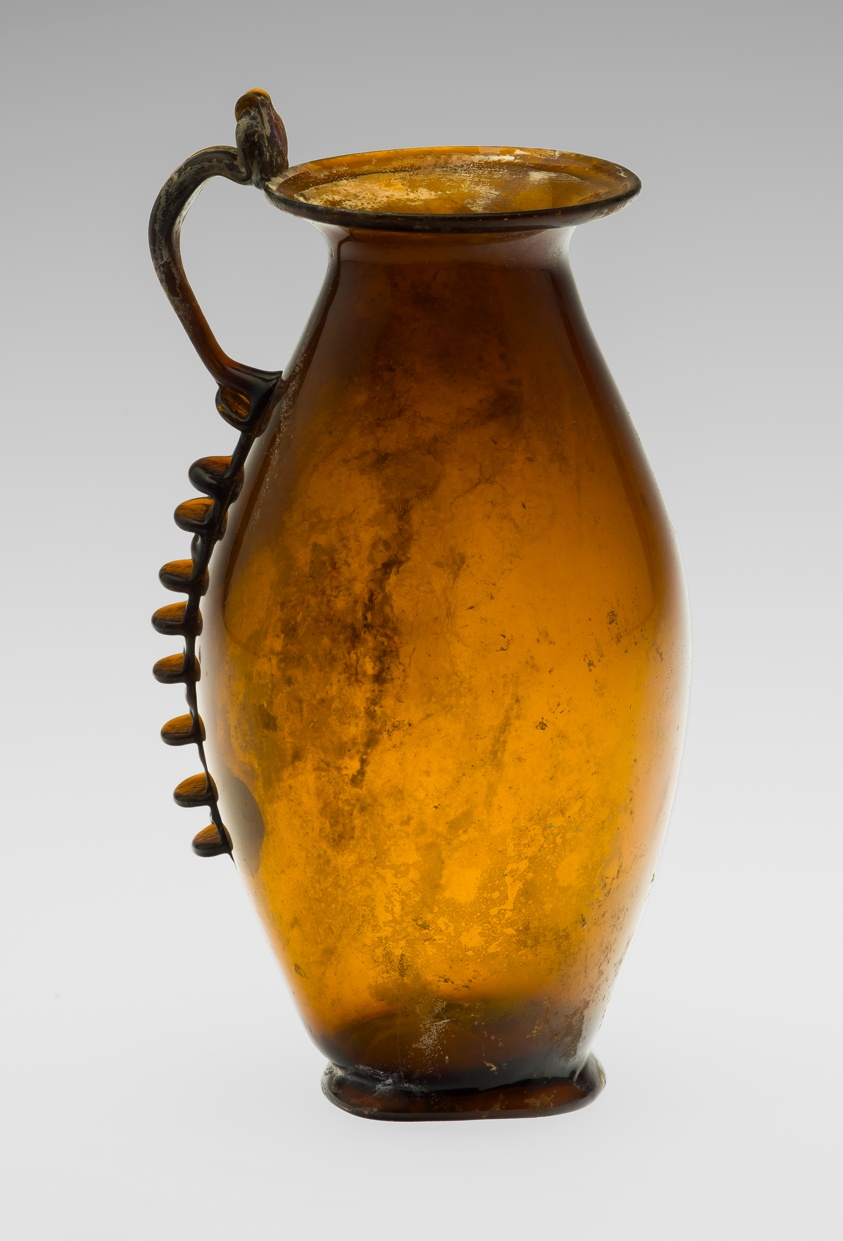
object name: Vessel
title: Jug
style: imperial (roman), ancient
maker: Roman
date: Late 1st-early 3rd century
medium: Glass, blown technique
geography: Roman Empire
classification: vessel; glass; ancient art; container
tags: containers, dining, drinking